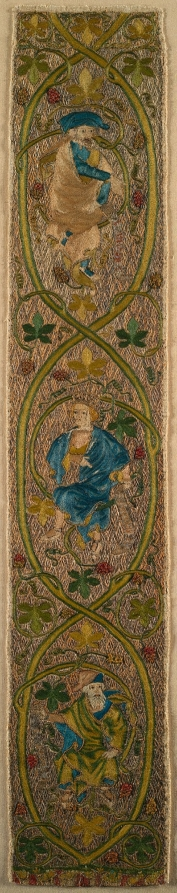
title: Orphrey Band: The Tree of Jesse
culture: England, 14th century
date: c. 1350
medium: Silk, gold and silver thread, linen; embroidery: split and couching stitches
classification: Embroidery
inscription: three figures framed by a scrolling vine dressed in medieval costumes hold scrolls on which their names are written in Latin; they read from top to bottom: Achim, Ezechias-Rex, and Eloud.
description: From the 1100s to the 1300s in London, both men and women worked as professional embroiderers. Here, the Tree of Jesse, a favorite medieval theme illustrating the ancestry of Christ, appears as a grapevine with three ancestors—Achim, Ezechias, and Eliud—seated on tendrils. Painters often provided embroiderers with designs, revealing a close relationship between the professions.